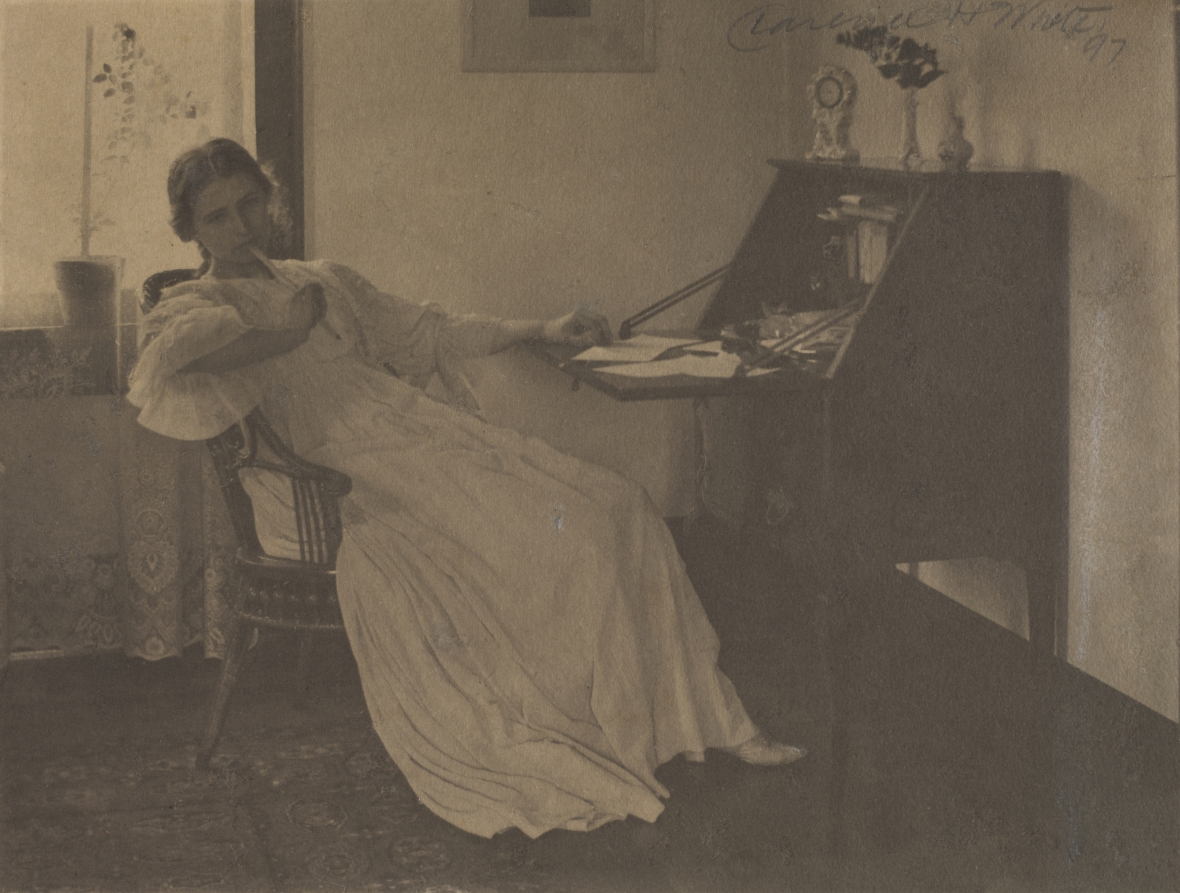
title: What Shall I Say?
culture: America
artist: Clarence H. White (American, 1871–1925)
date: 1896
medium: platinum print with graphite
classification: Photograph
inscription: Written in pencil on recto of photo: "Clarence H. White [signed] '97"; in pencil on verso: "Julia McCune by Clarence White--as dated on print 1897"